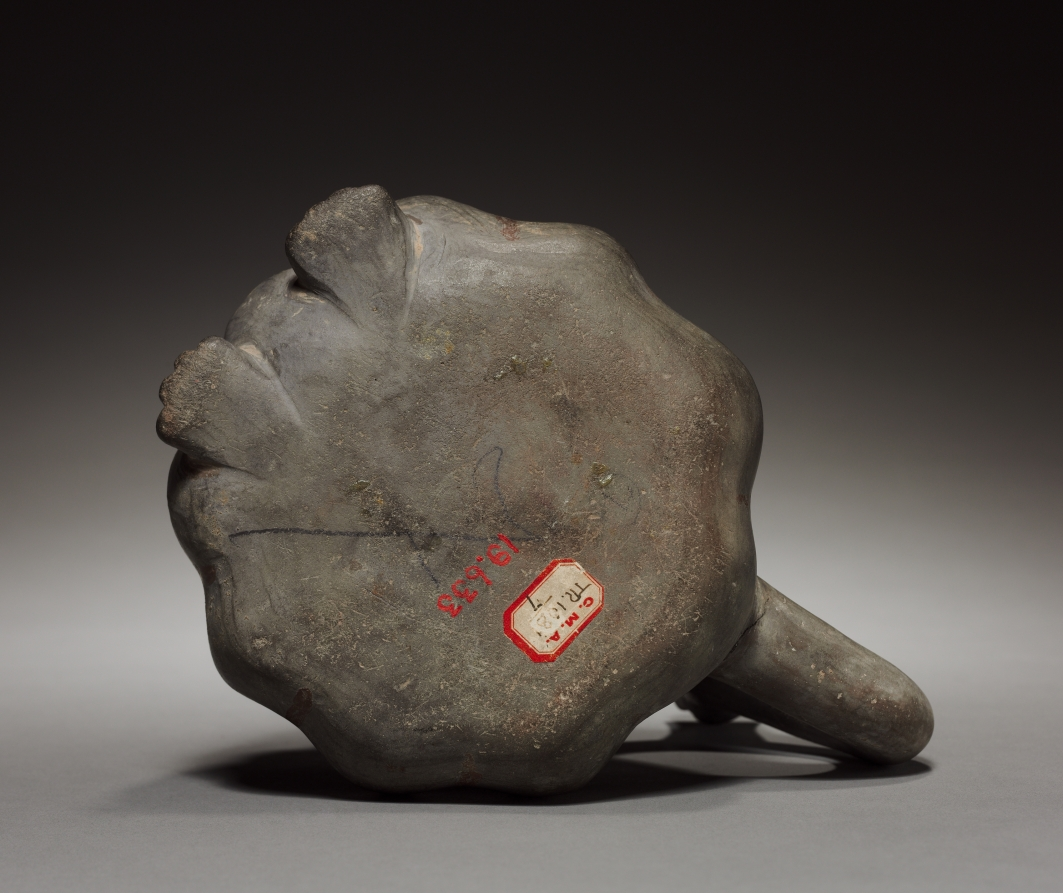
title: Bottle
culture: Peru, Chimú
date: 900–1470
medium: black ware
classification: Ceramic